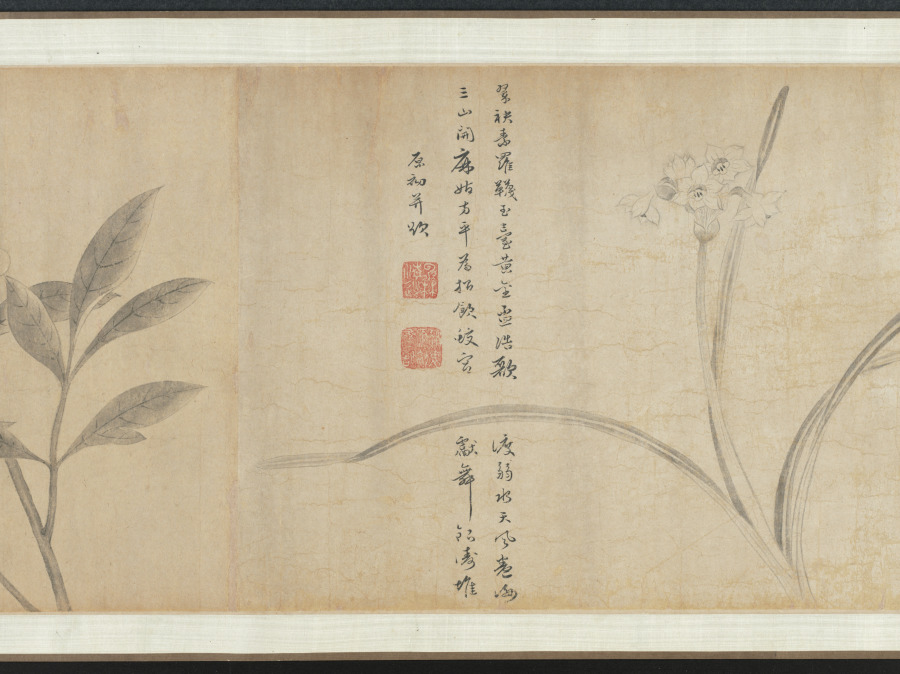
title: Ink Flowers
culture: China, Yuan dynasty (1271-1368)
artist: Zhao Zhong (Chinese, second half of the 1300s)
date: 1361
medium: Handscroll; ink on paper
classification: Painting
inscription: 寶帶同心結，香羅合歡扇。/ 繡作錦鴛鴦，雙雙為君獻。/ 薔薇露灑熏籠衣，馨香奉君君勿違。 原初并題。 [印] 趙衷原初畫記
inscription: 翠袂素羅韈，玉臺黃金盃。浩歌渡弱水。天風卷海三山開，麻姑方平為招飲，蛟宮獻舞銀濤堆。 原初并題。 [印] 雲林清趣、[印] 趙衷原初畫記。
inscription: 右用湯叔雅慶元中所寫墨花法作此卷，又效李長吉體賦詩以題之。詩與畫雖未工，要皆出於古人之餘，譬猶欲成方圓而必求其規矩之用也，識者毋誚焉！至正辛丑八月望日，東吳野人趙衷原初謹識。 [印] 趙原初、[印] 傳世清玩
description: Zhao Zhong's flowers, each paired with a poem, echo the fine-style colored flowers of the academic tradition, but instead he used only ink. Fine lines define the contours of each plant, as well as the veins within each petal and leaf. Careful ink washes give subtle modeling to the forms. The combination of lily, narcissus, and peony is unusual as the three belong to no known seasonal or symbolic system popular in the fourteenth century. Zhao’s medical training may have influenced the selection. Powdered lilies, for example, were prescribed to dispel grief, while the bark of tree peony roots was used as a treatment for various blood disorders.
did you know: This handscroll is a very rare example of ink flowers in the linear baimiao style of the fourteenth century.